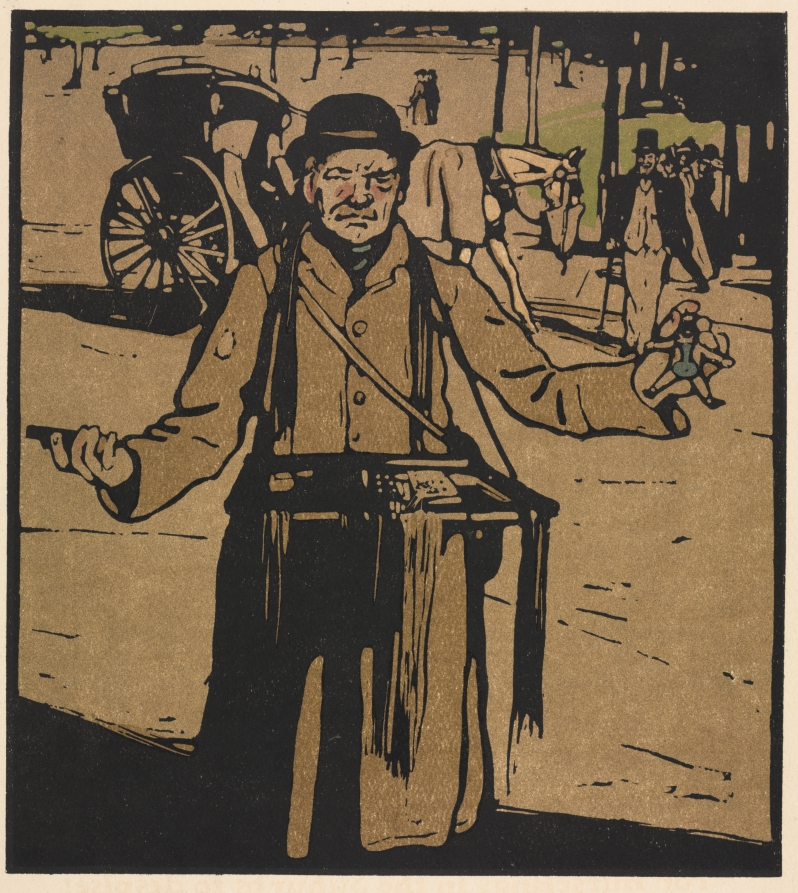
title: London Types: Hawker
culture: England, 19th century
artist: William Nicholson (British, 1872–1949)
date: 1898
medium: color lithograph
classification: Print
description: London Types celebrates the affection residents felt for their city at the end of the 19th century. The series includes many depictions of women because the publisher William Heinemann, a strong supporter of the struggle for equality, advised the artist to represent both sexes equally. The scenes document London of the 1890s with contemporary references.